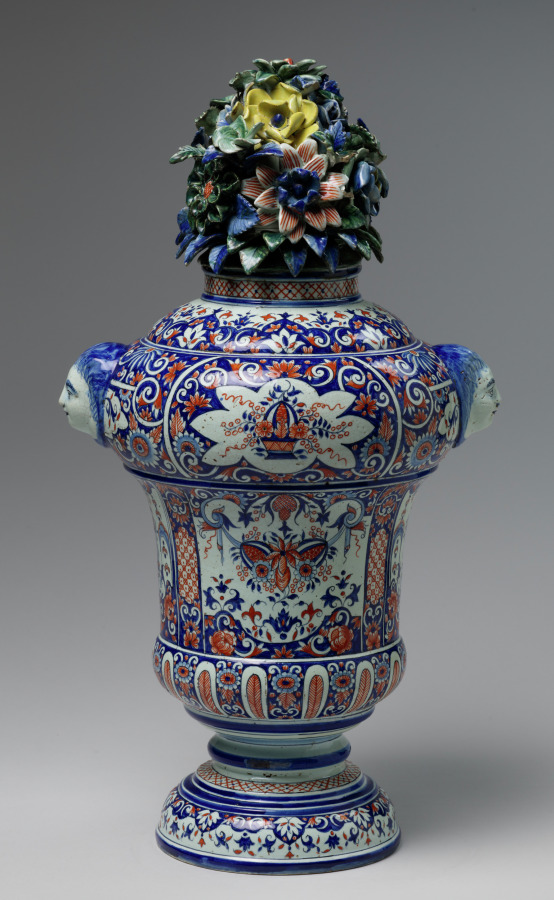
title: Vase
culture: France, Paris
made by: Samson & Co. (French)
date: early 1900s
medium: faience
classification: Ceramic